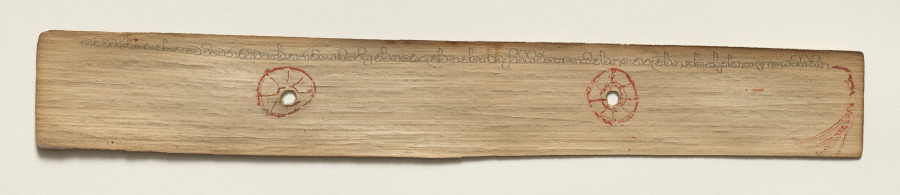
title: Leaf from a Buddhist Manuscript (verso)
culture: Sri Lanka, Singhalese, Late 17th century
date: c. 1700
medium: fiber paper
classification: Manuscript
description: Palm leaf material is still used for manuscripts in Sri Lanka. The palm leaves are prepared first by boiling them, drying them in the sun, and then rubbing them with oils. Scribes then use a metal stylus to incise the text. Then charcoal powder is wiped across the pages, filling in only the inscribed lines.